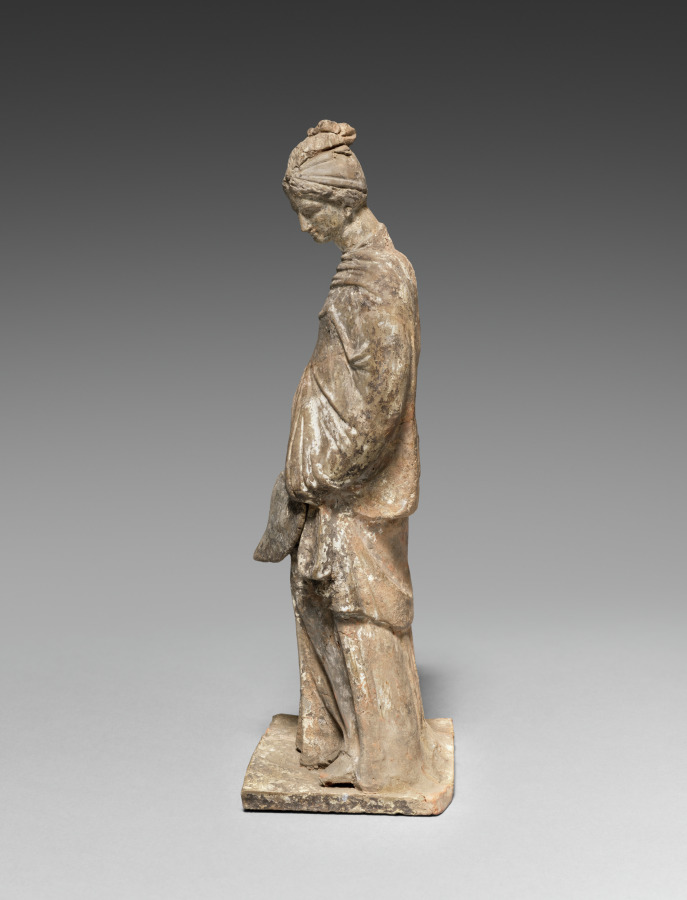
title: Figurine of a Lady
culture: Greece, Tanagra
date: 200s BCE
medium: terracotta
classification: Sculpture